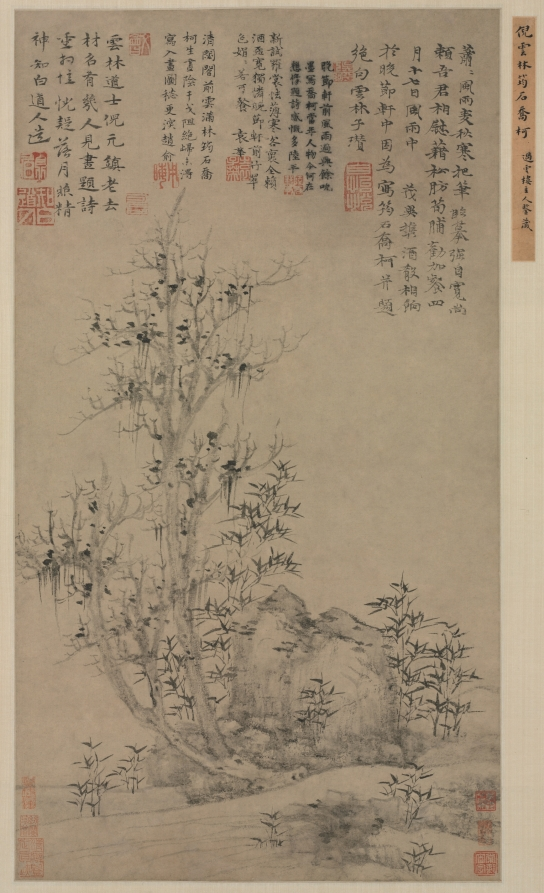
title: Bamboo, Rock, and Tall Tree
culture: China, Yuan dynasty (1271–1368)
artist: Ni Zan (Chinese, 1301–1374)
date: c. 1300s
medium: hanging scroll; ink on paper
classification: Painting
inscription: Artist's inscription, signature, and seal: Windy and rainy days - what a chilly wheat-harvesting season,/ With brush in hand, I fight depression by copying./ Fortunately, I can depend upon you, my friend, to send me consolation -/ "Pine-lard" wind, and meat with bamboo shoots that never fail to awaken appetite./ Yunlinzi, Zan. [seal] Ziyiyue.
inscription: 4 additional inscriptions and 14 additional seals: 1 poem and 3 seals, possibly of Chang Yü (1277–1350); 1 poem and 1 seal of Yüan Hua (1316–end of 14th c,); 1 poem and 2 seals of Lu P'ing (1438–1521); 1 seal of Liang Qingbiao 梁清標 (1620–1691); 1 poem and 1 seal of Chao Yü (1638–1713); 1 seal of ? Jen-lan (dates unknown); 2 seals of Gu Wenbin 顧文彬 (1811–1889); 1 seal of C. C. Wang 王季遷 (1907–2003); 2 seals unidentified.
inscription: Poem possibly by Chang Yü: The Daoist of the Cloudy Forest, Ni Yuanzhen,/ How many people can enjoy a fame in old age like yours?/ Seeing the painting, I wrote the poem in fond memories./ I feel as if I am bathed in the light of the fading moon/ Which shines on your spirit as always.